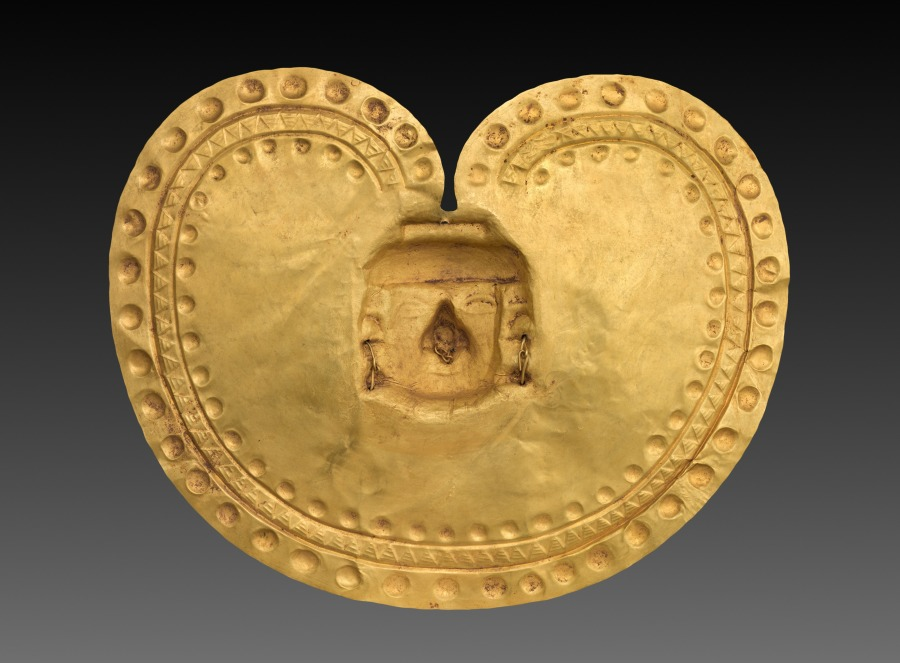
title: Pectoral (Chest Ornament)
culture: Isthmian Region (Colombia), Calima, Yotoco period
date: 1–800 CE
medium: gold, hammered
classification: Metalwork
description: Bilobed pectorals are some of the most flamboyant objects created by artists in Colombia’s Calima region. Chiefs apparently wore such pectorals—among the largest torso adornments ever created in the ancient Americas—with other gold objects, including bracelets, dramatic headdress adornments, and ear and nose ornaments like those shown on the pectoral itself. Thus, they armored themselves in gold, which likely had complex symbolism; for instance, it may have been associated with the sun and thereby with nourishing cosmic energies and positive moral behavior.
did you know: Calima bilobed pectorals are among the largest torso ornaments ever made in the ancient Americas.